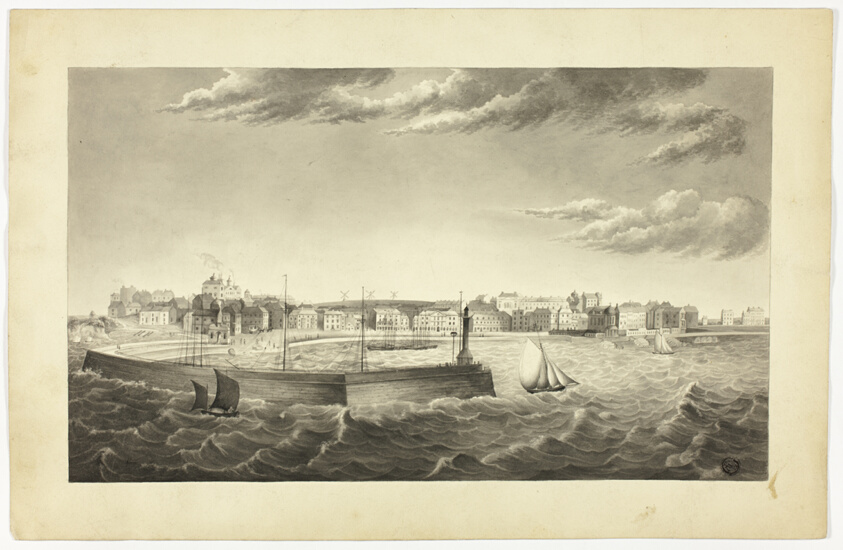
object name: Drawing and Watercolor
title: City View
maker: Unknown Artist; European, 19th century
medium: Pen and black ink and brush and gray wash, heightened with touches of white chalk, on cream wove card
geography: Europe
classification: drawings (visual works); pen and ink drawings; brush and wash; paper; prints and drawing